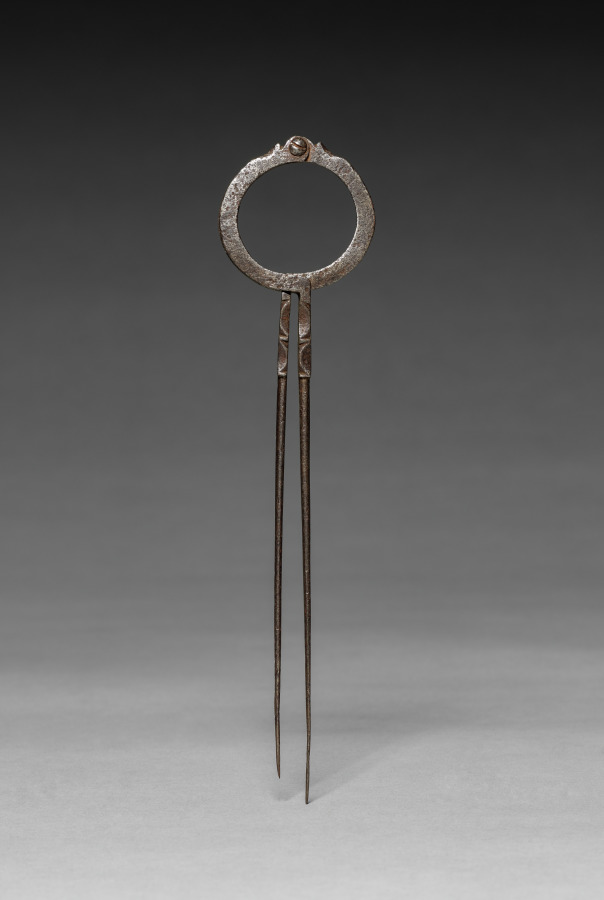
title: Dividers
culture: Europe, 17th century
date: 1600s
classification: Tool